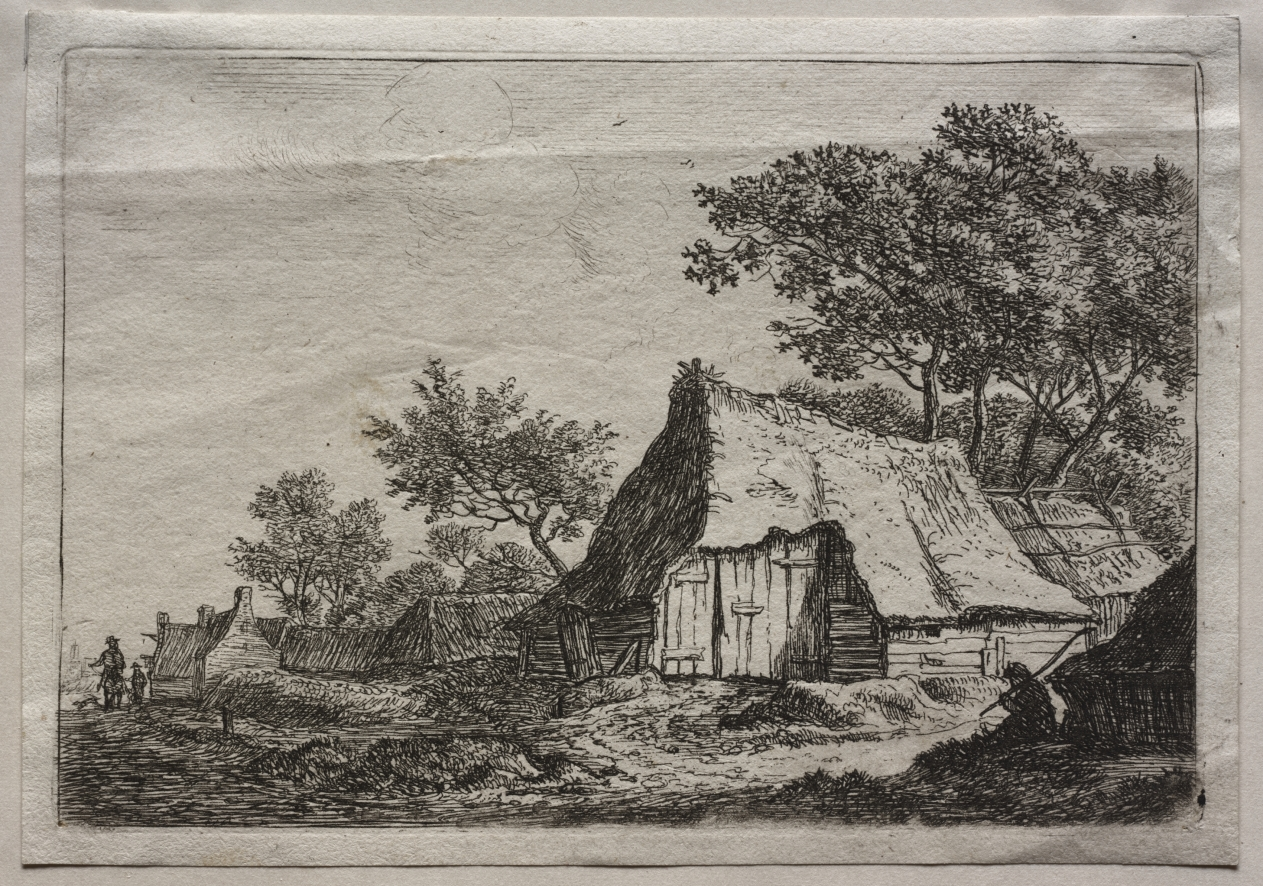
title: Twelve Landscapes: Plate I, The Small Hamlet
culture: Netherlands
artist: Anthonie Waterloo (Dutch, 1609/10–1690)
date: 1640–90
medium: etching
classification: Print